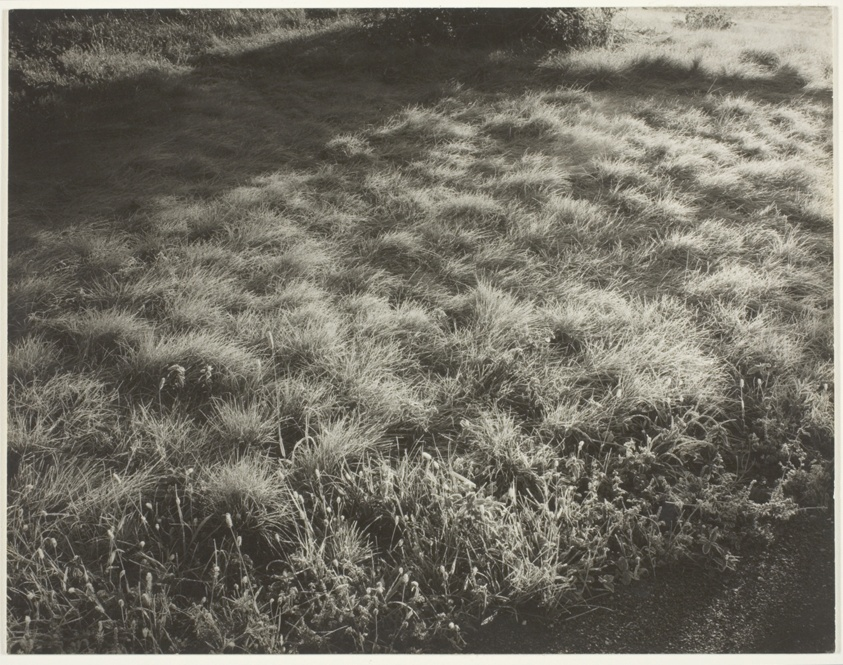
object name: Photograph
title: Grass and Frost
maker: Alfred Stieglitz (American, 1864–1946)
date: 1934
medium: Gelatin silver print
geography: United States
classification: gelatin silver (developing-out-paper) pr; photographic process; photography; photograph